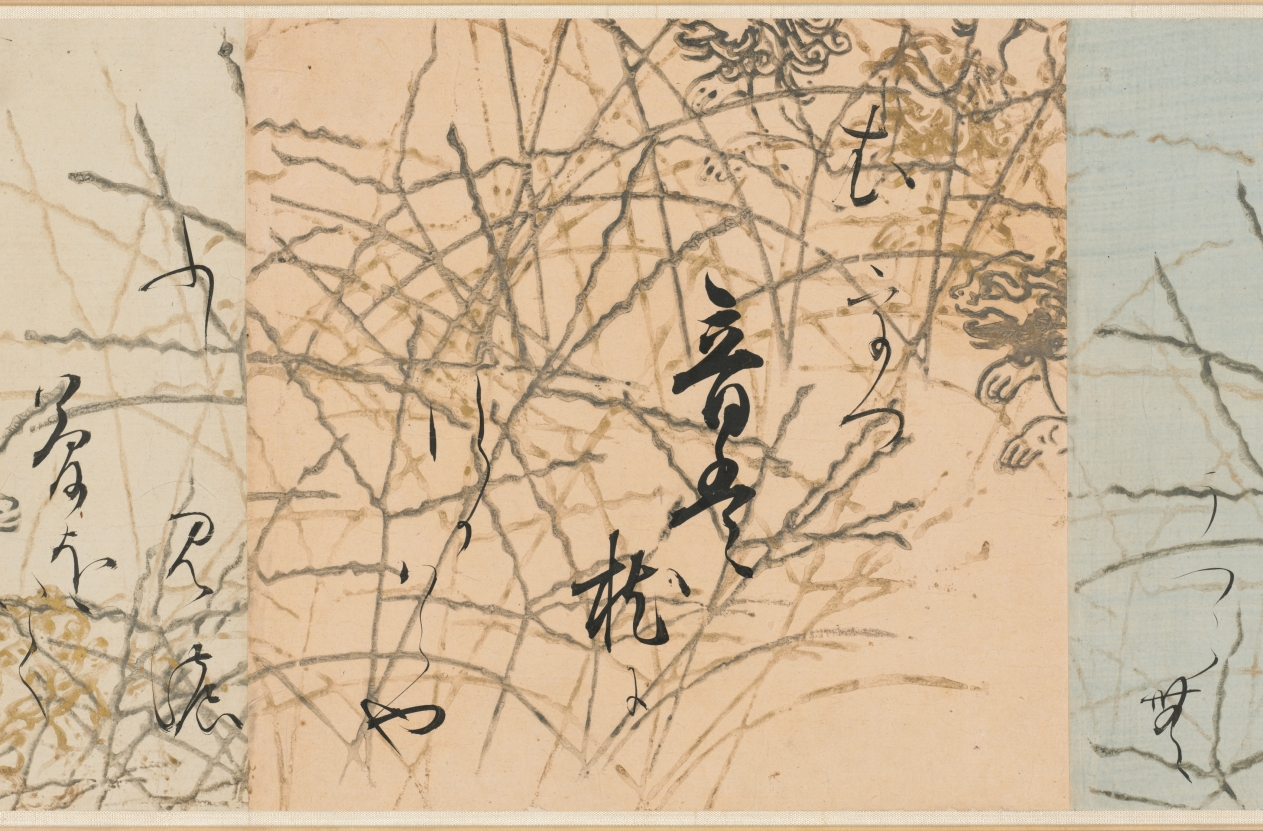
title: Selections from the New Collection of Japanese Poems from Ancient and Modern Times (Shinkokin wakashū) with Printed Designs of Chinese Lions and Crab Finger Grass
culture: Japan, Edo period (1615–1868)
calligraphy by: Hon'ami Kōetsu (Japanese, 1558–1637)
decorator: Tawaraya Sōtatsu (Japanese, c. 1570–c. 1640)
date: early 1600s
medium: handscroll; ink, gold, and silver on paper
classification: Calligraphy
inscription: Seal: 光悦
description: Hon’ami Kōetsu was a calligrapher and craftsman who frequently collaborated with the painter Tawaraya Sōtatsu, considered the first master of the Rinpa school. Kōetsu brushed seven poems from the autumn section of a poetry anthology onto dyed paper with motifs designed and printed in gold and silver by Sōtatsu.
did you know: Before becoming a master painter of screens, Tawaraya Sōtatsu painted fans.